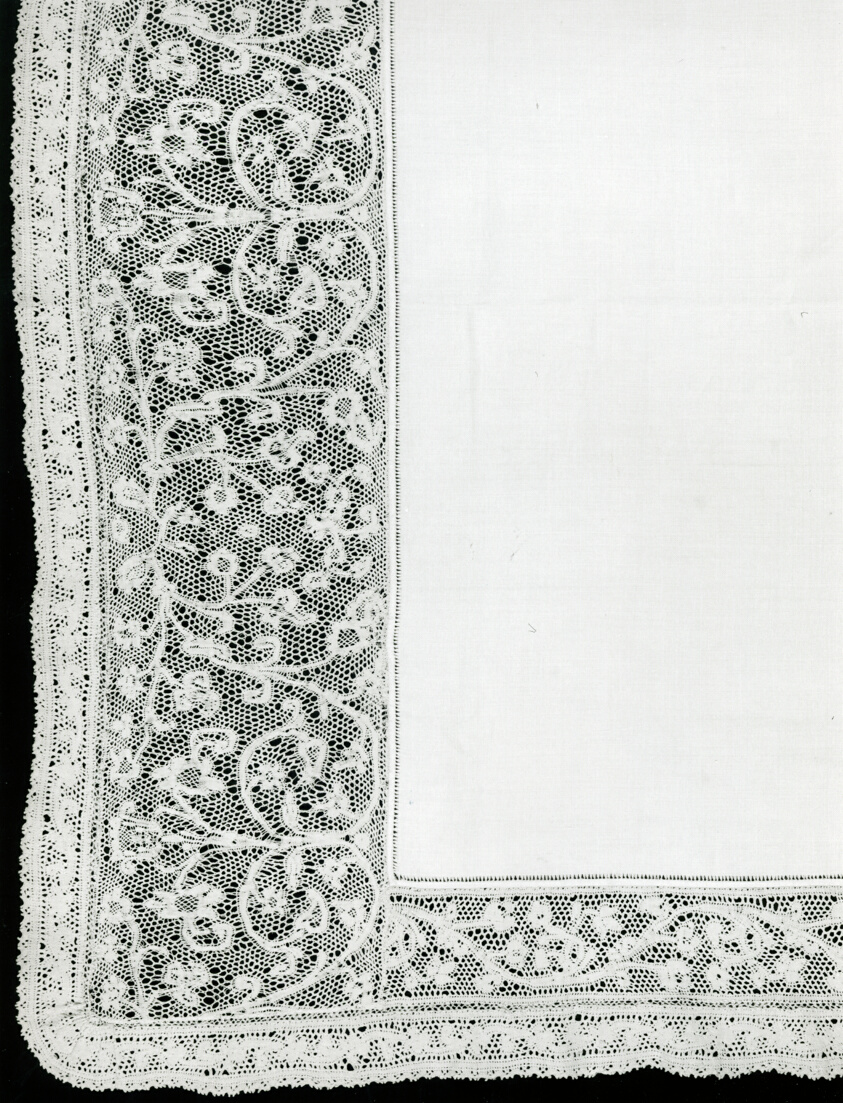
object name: Textile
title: Cover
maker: Italy, Abruzzi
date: Second half of 18th/early 19th century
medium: Linen, plain weave; cut and drawn work; embroidered with cotton in antique hem stitches; edged with linen, bobbin straight lace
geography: Italy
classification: textile; lace - bobbin